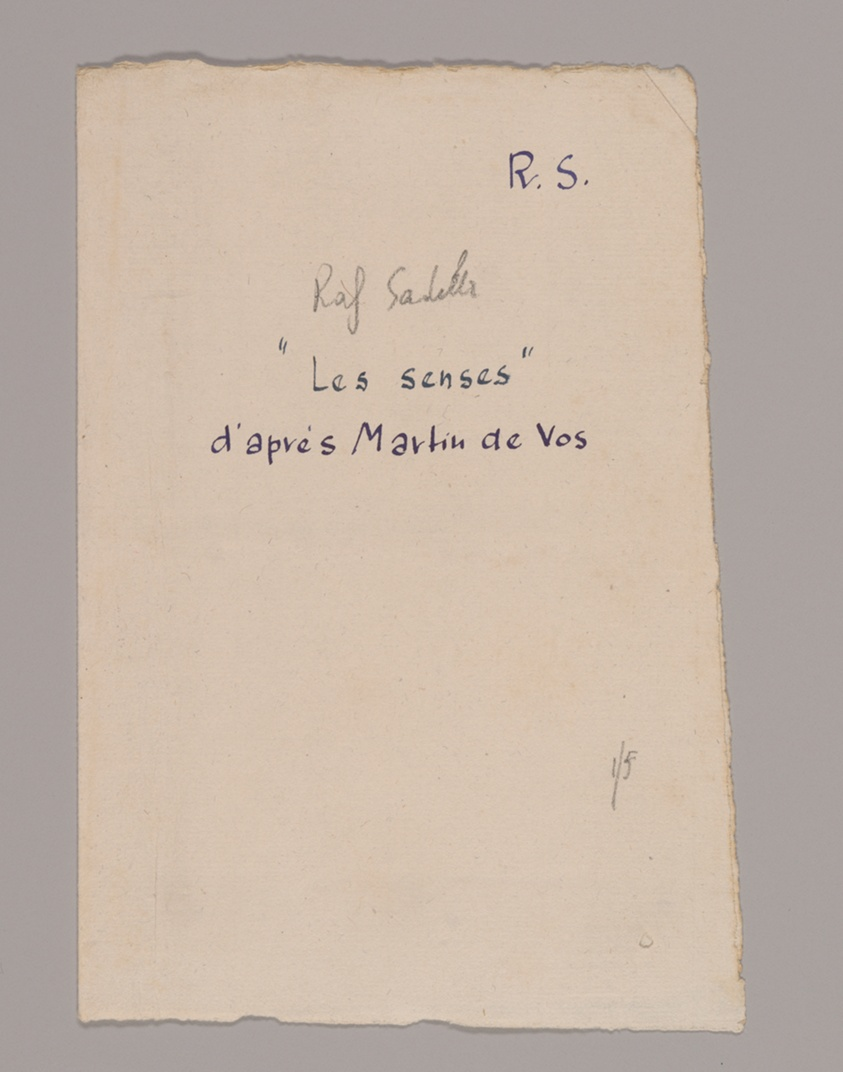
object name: Print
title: Sight, from The Five Senses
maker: Raphael Sadeler I (Flemish, 1560/61–1628/32); after Maarten de Vos (Flemish, 1532–1603)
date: 1581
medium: Engraving on paper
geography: Flanders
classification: engraving; paper; print; prints and drawing